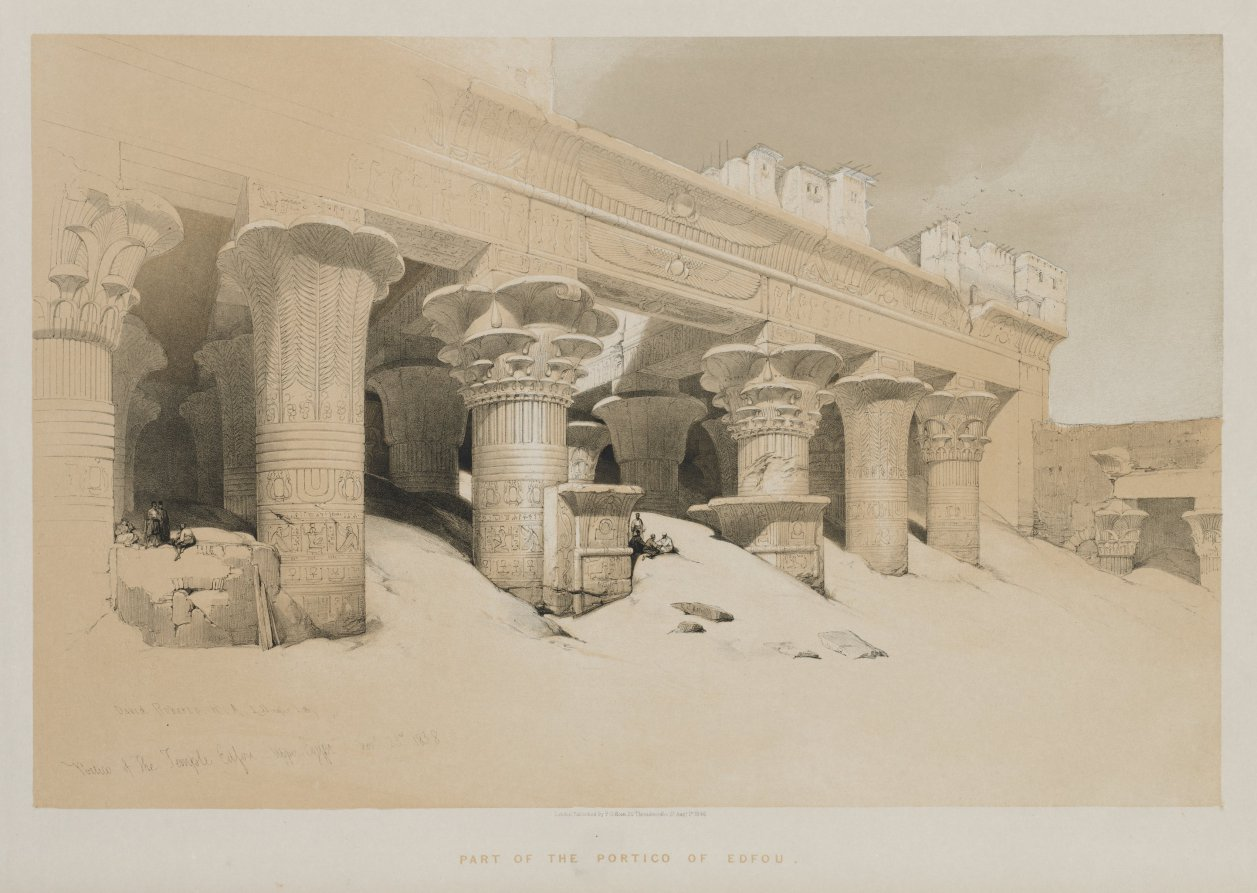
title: Egypt and Nubia Volume I: Portico of the Temple Edfou, Upper Egypt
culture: England, 19th century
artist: Louis Haghe (British, 1806–1885)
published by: F. G. Moon, 20 Threadneedle Street, London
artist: after David Roberts (Scottish, 1796–1864)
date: 1846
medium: color lithograph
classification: Print